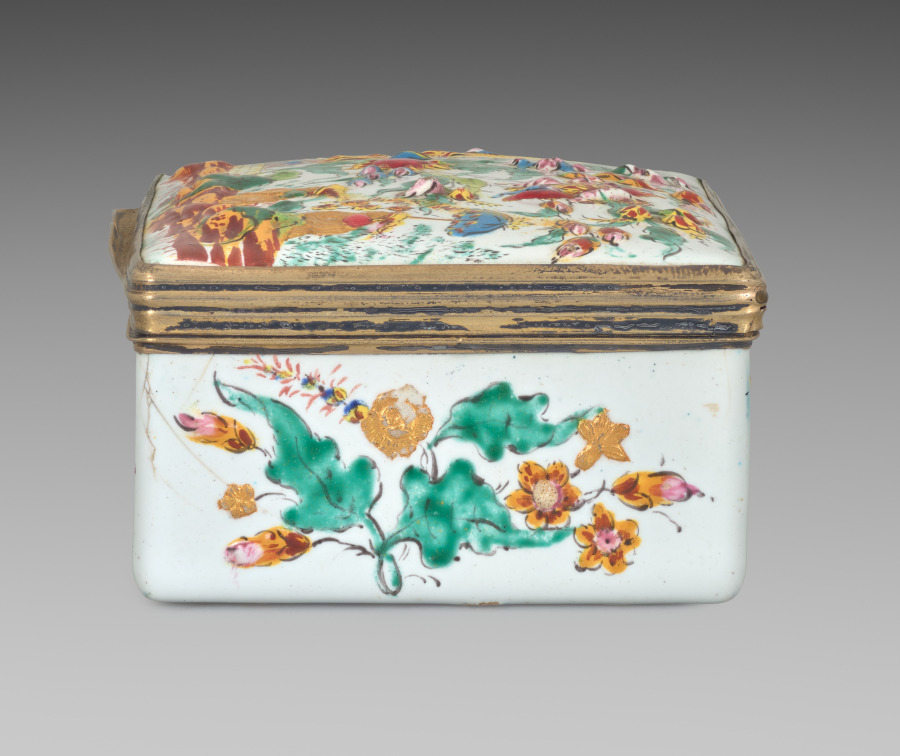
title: Box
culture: France, 18th century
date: 1749–50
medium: silver gilt and enamel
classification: Enamel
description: Chinoiserie in 18th-century France incorporated imitations of East Asian motifs, designs, and ornaments into European art. These imitations were often distorted by the European imagination and were not accurate representations of the cultures from which they drew inspiration. Elements of chinoiserie in this box can be seen primarily on the lid where enormous, vibrantly colored flowers tower over two crouching figures and a grouping of buildings.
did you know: The flower petals on the box lid are raised, an effect produced by drops of transparent enamel placed on the box’s surface that imitates polished gemstones or pearls.